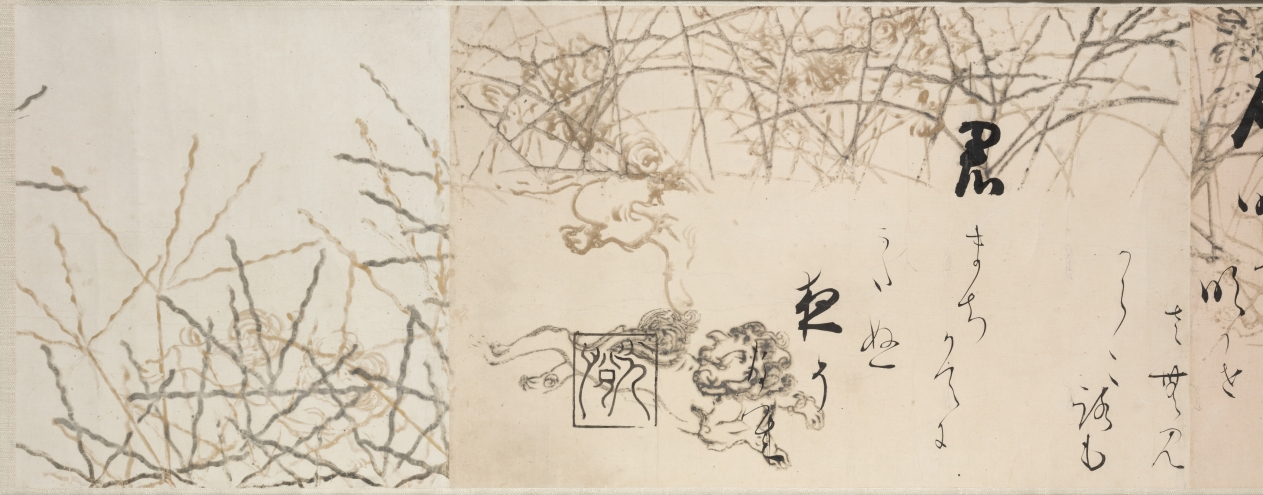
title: Selections from the New Collection of Japanese Poems from Ancient and Modern Times (Shinkokin wakashū) with Printed Designs of Chinese Lions and Crab Finger Grass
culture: Japan, Edo period (1615–1868)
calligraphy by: Hon'ami Kōetsu (Japanese, 1558–1637)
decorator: Tawaraya Sōtatsu (Japanese, c. 1570–c. 1640)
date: early 1600s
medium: handscroll; ink, gold, and silver on paper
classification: Calligraphy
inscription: Seal: 光悦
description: Hon’ami Kōetsu was a calligrapher and craftsman who frequently collaborated with the painter Tawaraya Sōtatsu, considered the first master of the Rinpa school. Kōetsu brushed seven poems from the autumn section of a poetry anthology onto dyed paper with motifs designed and printed in gold and silver by Sōtatsu.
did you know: Before becoming a master painter of screens, Tawaraya Sōtatsu painted fans.